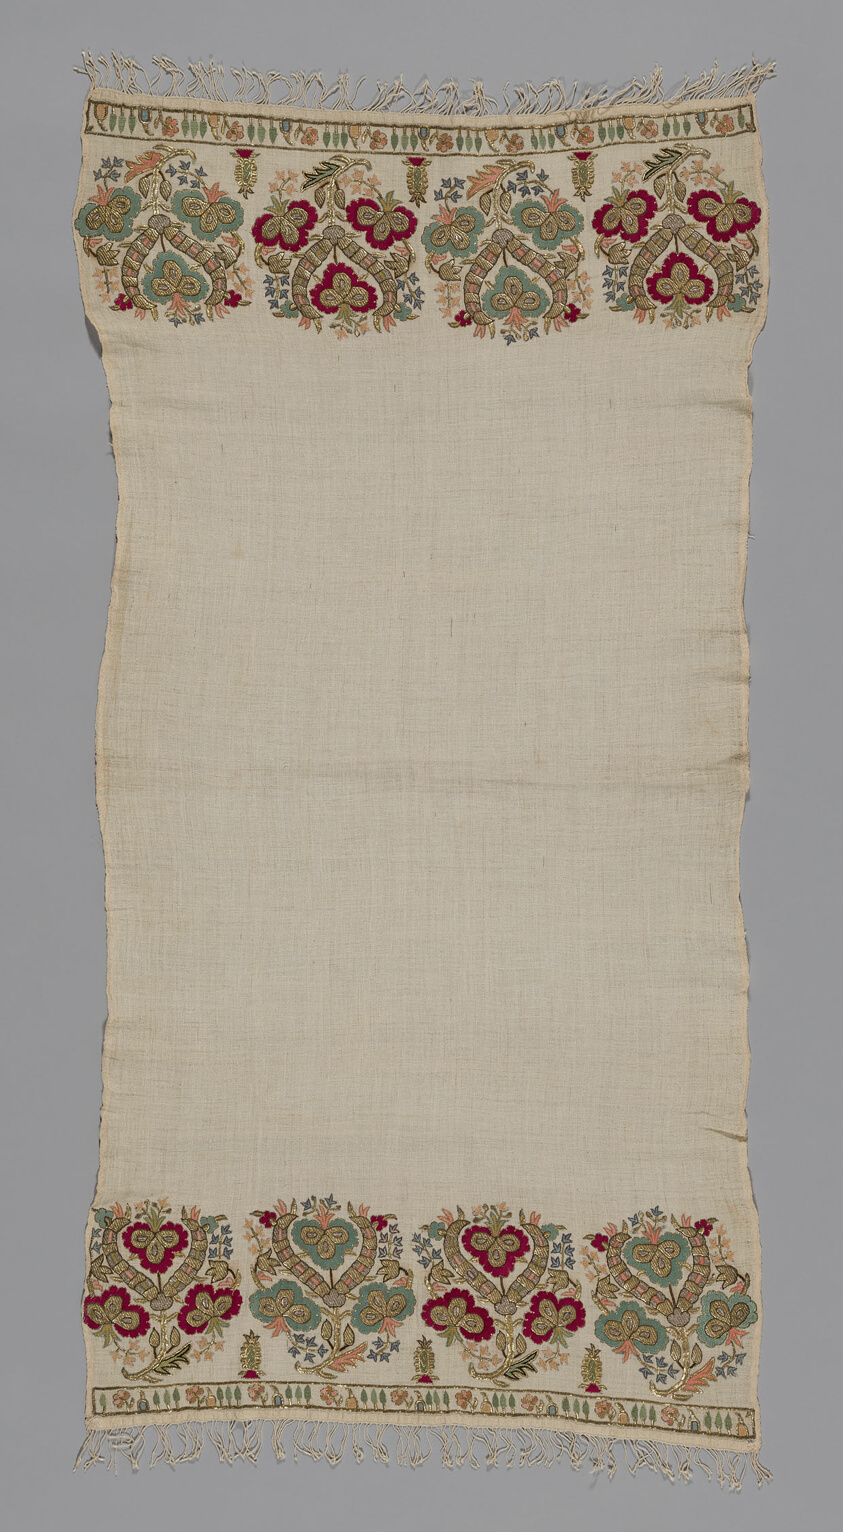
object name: Textile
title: Towel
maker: Greece, Northern Sporades Islands, Lesbos, Mytilene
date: 18th century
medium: Linen, plain weave; embroidered with silk, silvered-and-gilt-metal-strip-wrapped silk in double running, running (pattern darning), flat, satin, and stem stitches; main warp plied fringe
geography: Lésvos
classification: textile; needlework (visual works)